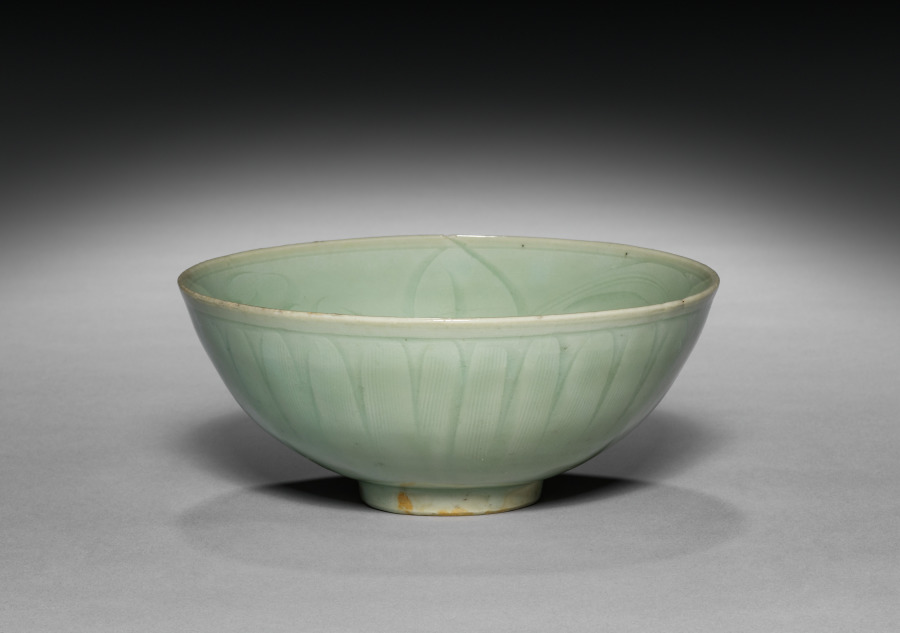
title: Bowl with Carved Lotus Design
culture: China, Southern Song (1127–1279) to Yuan dynasty (1279–1368)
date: 1100s–1300s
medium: Stoneware with pale green (celadon) glaze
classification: Ceramic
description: This pale green–glazed bowl is decorated with a medallion at the center and a lotus motif on the inside and outside walls. China’s increasingly prosperous ceramic industry began exporting green stoneware during the Tang dynasty (618–906) as far as North Africa. Imitations in Korea, Japan, Southeast Asia, and the Middle East are evidence of its popularity and enormous success as export ware.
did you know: In Chinese Buddhist culture, the lotus flower symbolizes good fortune and the process of achieving spiritual enlightenment.